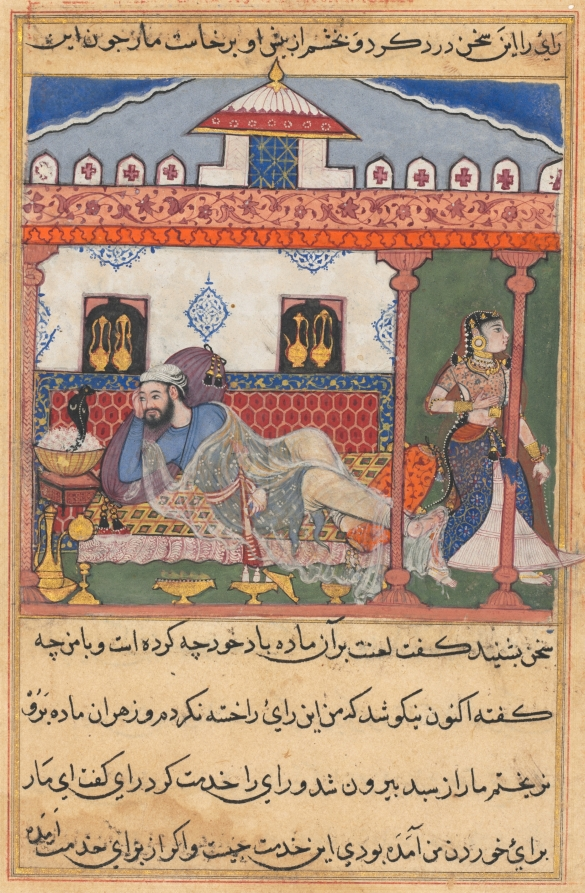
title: The snake, hidden in a basket of flowers, reveals himself to the Raja who has just sent away his wife, from a Tuti-nama (Tales of a Parrot): Forty-third Night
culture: Mughal India, court of Akbar (reigned 1556–1605)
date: c. 1560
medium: gum tempera, ink, and gold on paper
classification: Painting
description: A black cobra appears beside the raja’s bed, intending to poison him in revenge for his earlier cruelty. The raja, who had mutilated the snake’s wife, reveals that he did so only after watching her seduce another snake. Upon realizing his wife’s treachery, the grateful cobra grants the raja the ability to talk to animals.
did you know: The raja has sent his wife away after realizing the treachery of women.